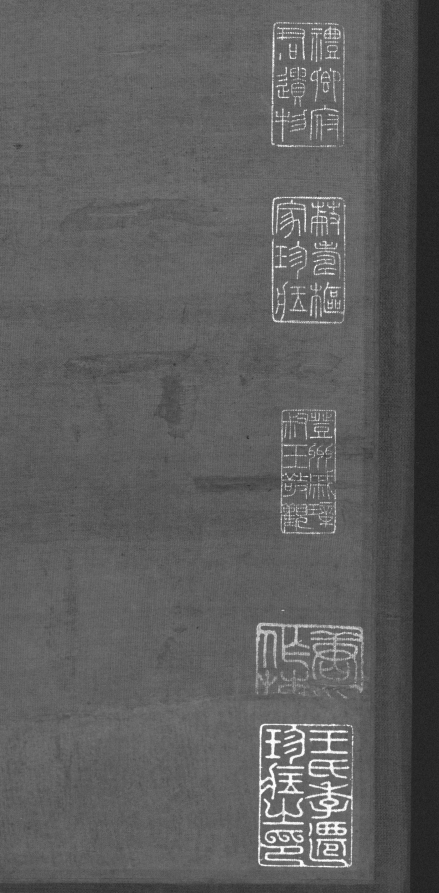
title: Xu Jingyang Moving His Family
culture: China, Ming dynasty (1368–1644)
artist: Cui Zizhong (Chinese, 1574–1644)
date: 1644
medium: Hanging scroll; ink and color on silk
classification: Painting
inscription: Artist's 2 seals: Pei-hai, Cui Zizhong yin.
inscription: 9 additional seals: 2 of Xiang Yuan (18th-19th c.); 1 of Tang Zuomei (late 18th-19th c.); 1 of Zhang Heng 張珩 (1915-1963); 1 of C. C. Wang 王季遷 (1907–2003); 4 unidentified.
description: Xu Jingyang was a dedicated fourth-century Confucian official who allegedly turned into a Daoist immortal. This scroll depicts the legend that when he attained immortality, he took his entire household, including chickens and dogs, to paradise. Cui Zizhong’s painting style intentionally referenced ancient masters. Typical of the pre-Song dynasty landscape tradition, there is the use of blue and green colors and an emphasis on outline rather than texture. While the trembling outlines are reminiscent of earlier painters, the flickering light on rocks and trees is a stylistic feature of Cui’s own time.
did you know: Xu Jingyang, wearing red, is in the upper register of figures, while below his servants transport a rooster, dog, and other supplies.